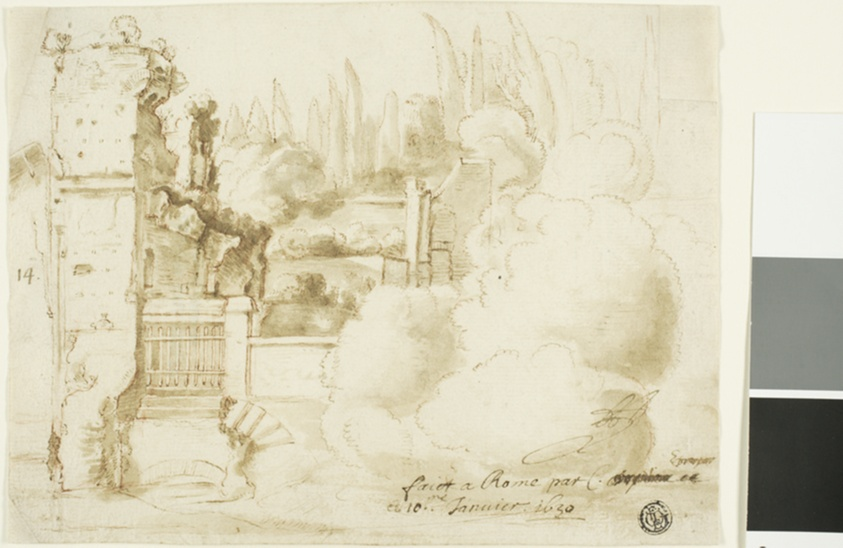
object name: Drawing and Watercolor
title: Roman Landscape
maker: Possibly the school of Claude Lorrain; French, 1600-1682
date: 1630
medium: Pen and brown ink, with brush and brown wash, over red chalk, on cream laid paper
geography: France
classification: pen and ink drawings; drawings (visual works); prints and drawing